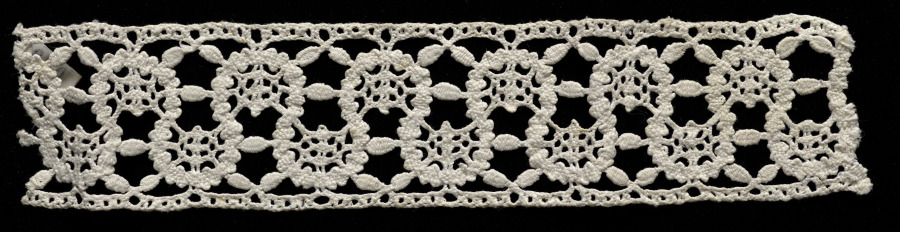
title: Lace Insertion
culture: Italy, Genoa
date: 1600s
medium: Bobbin lace (Rose Lace)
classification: Lace